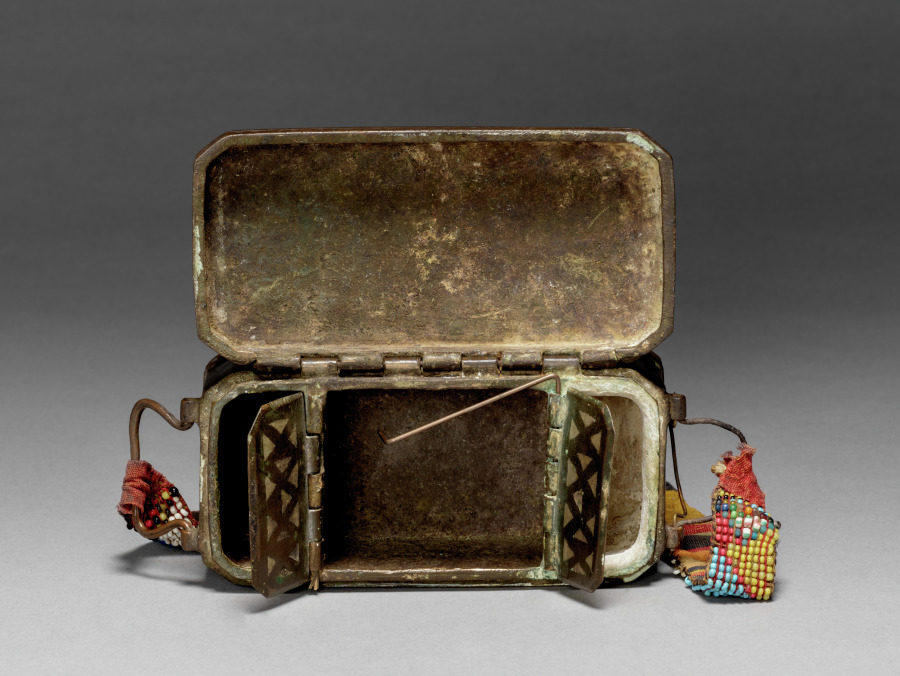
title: Betel nut container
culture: Philippines, Mindanao, most likely Maranao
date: 1800s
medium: Cast brass with silver inlays, weave fabric (handle), glass beads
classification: Arms and Armor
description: Chewing betel has been a social ritual common throughout Southeast Asia and Oceania for centuries. This betel nut container held the ingredients (areca nut, slaked lime, and betel leaves) used for this practice. The rectangular box, made of cast brass, is richly decorated with inlaid silver geometric motifs. It features a multicolored beaded strap with a pattern typical of the Bagobo people.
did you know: The beaded strap suggests portability; it may have been worn or suspended during social gatherings.